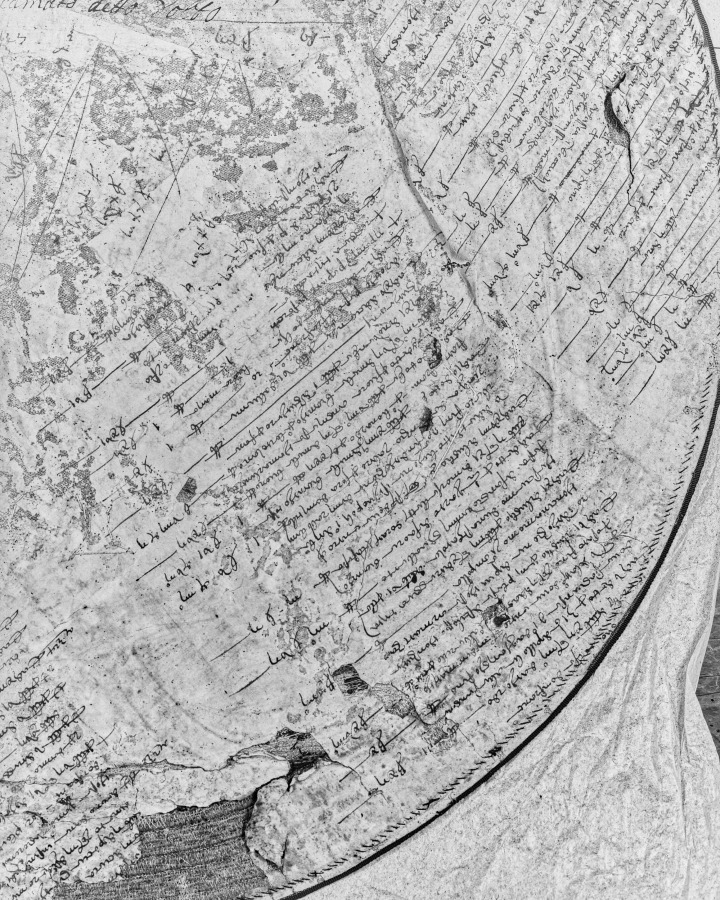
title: Embroidered Tondo from an Altar Frontal: The Coronation of the Virgin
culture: Italy, Florence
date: 1459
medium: Embroidery with gold, silver, and silk thread; split, satin, and couching stitches, or nué (shaded gold)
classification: Embroidery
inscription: the embroidery is backed by an old reused parchment with Latin writing over which in Italian is penned an inscription: "This pallioto was embroidered in the year 1486 by the venerable Margherita del Caccia nun of this monastery. . ." [It is difficult to know to what extent one should rely on this inscription as the style and technique both point clearly to an earlier date.]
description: This masterpiece of Florentine embroidery takes the circular form called a tondo and was likely once attached to an altar frontal. The scene depicts the coronation of the Virgin, the final and culminating event in the narrative cycle of her life. Honoring her as queen of heaven, Christ places the crown on his mother’s head. They are surrounded by eight angels as well as Saints Verdiana and John Gualberto, both much esteemed in Florence, creating a joyous scene. During the Renaissance, Florence emerged as an important center for a specific type of embroidery known as or nué, or shaded gold. This stunning technique used metal and silk threads, as seen here, to create pictures that rivaled paintings. It was frequently used for vestments and altar frontals.